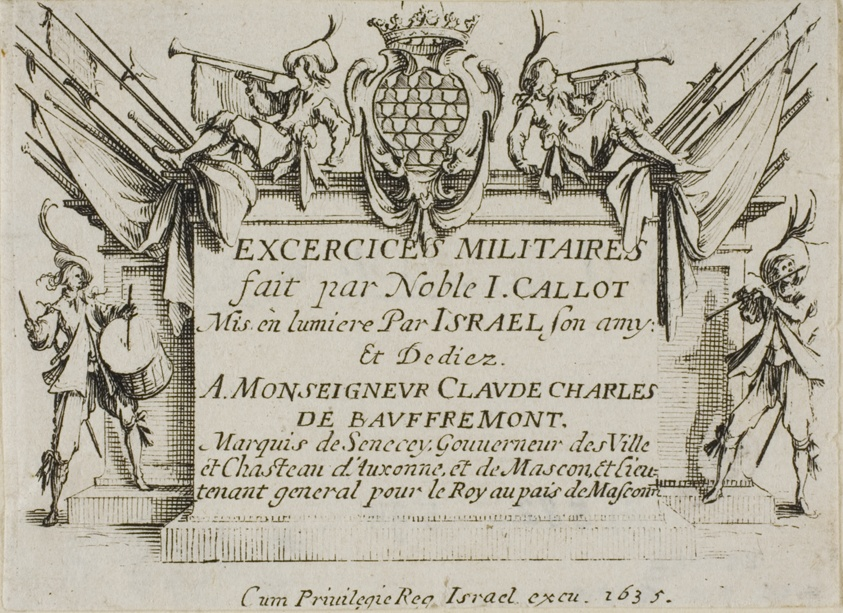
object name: Print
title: Frontispiece, from The Military Exercises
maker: Jacques Callot (French, 1592-1635); published by Israël Henriet (French, 1590-1661)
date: published 1635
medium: Etching on paper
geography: France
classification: etching; print; prints and drawing